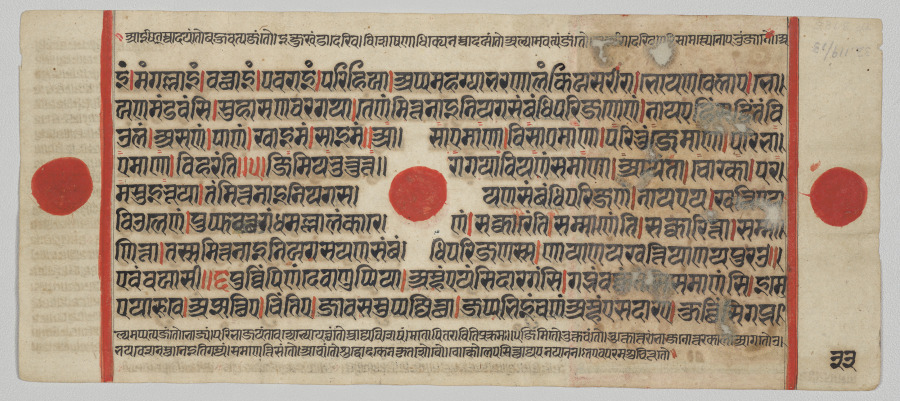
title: Text, Folio 33 (verso), from a Kalpa-sutra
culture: Western India, Gujarat, last quarter of the 15th century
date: c. 1475–1500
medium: Gum tempera, ink, and gold on paper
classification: Painting